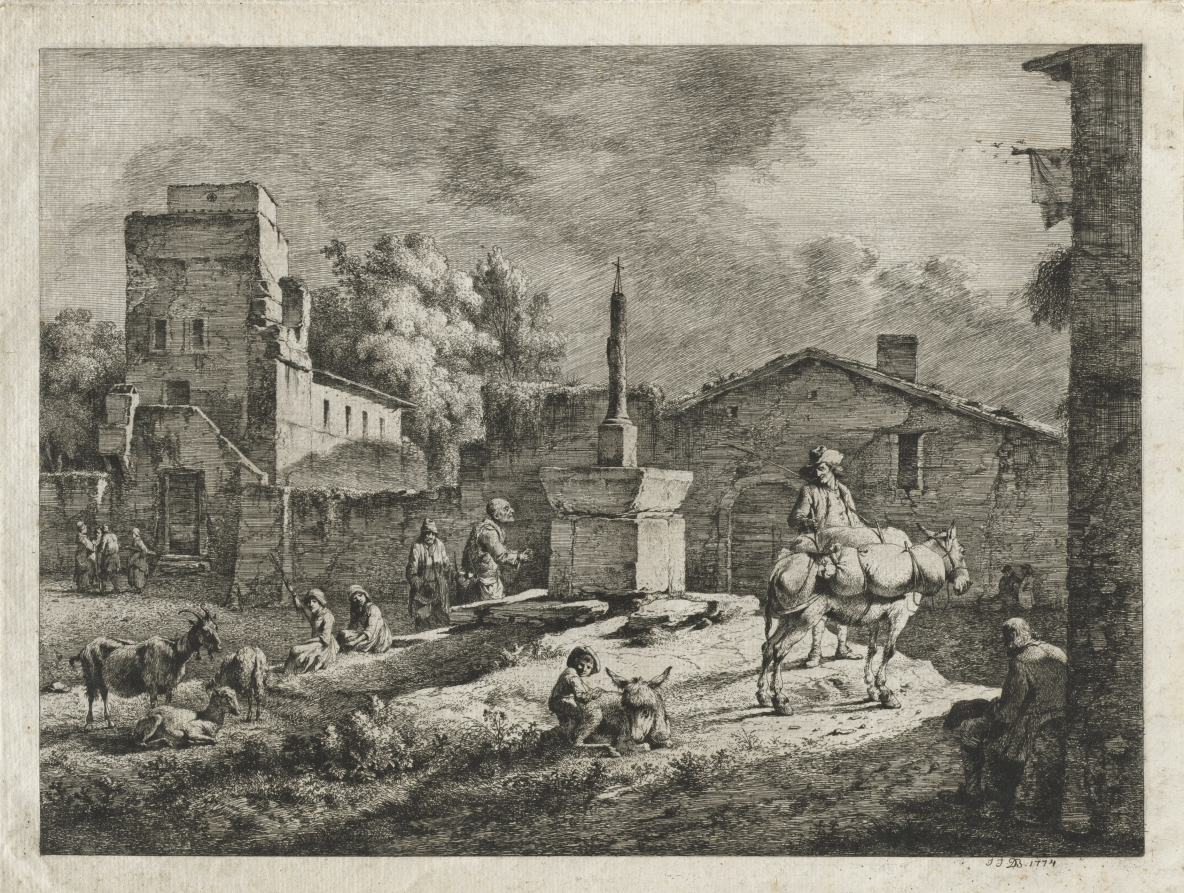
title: View of Saint-Andeol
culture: France, 18th century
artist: Jean Jacques de Boissieu (French, 1736–1810)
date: 1774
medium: etching and drypoint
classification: Print